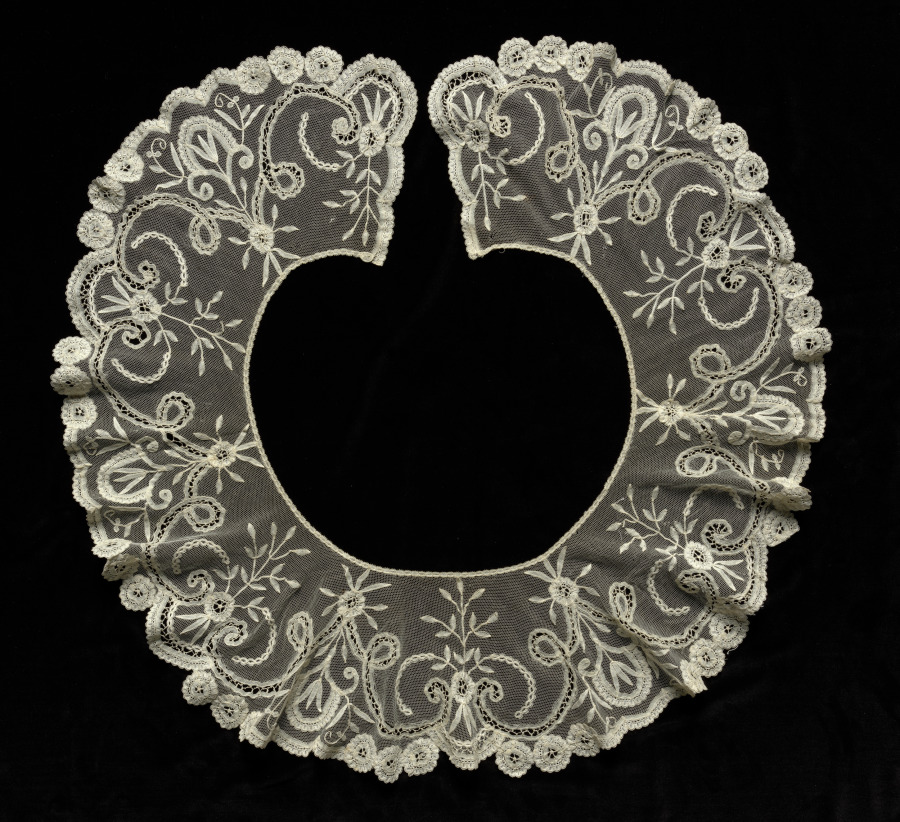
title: Lace Collar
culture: Flanders, 19th century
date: 1800s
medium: Linen: machine-made lace net with bobbin lace appliqué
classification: Lace